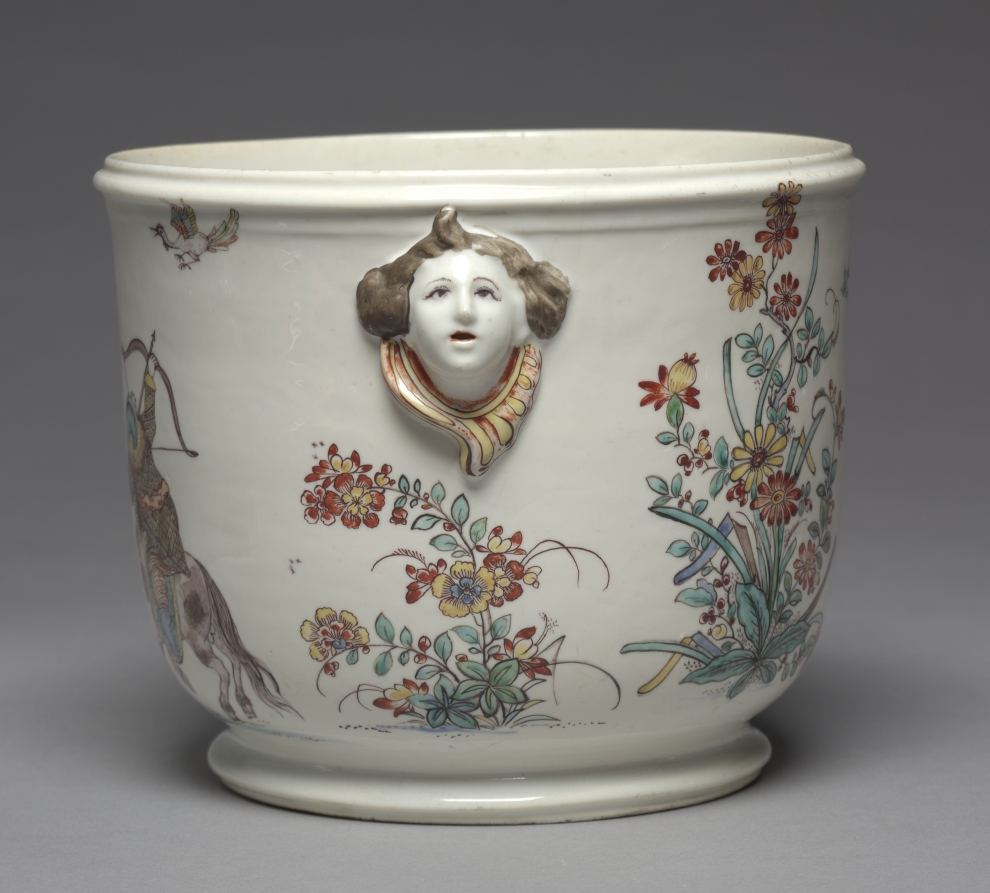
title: Bottle Cooler (seau a bouteille)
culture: France, Mennecy, 18th century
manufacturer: Mennecy- Villeroy Factory (French)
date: c. 1755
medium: Tin-glazed soft-paste porcelain with enamel decoration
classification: Ceramic